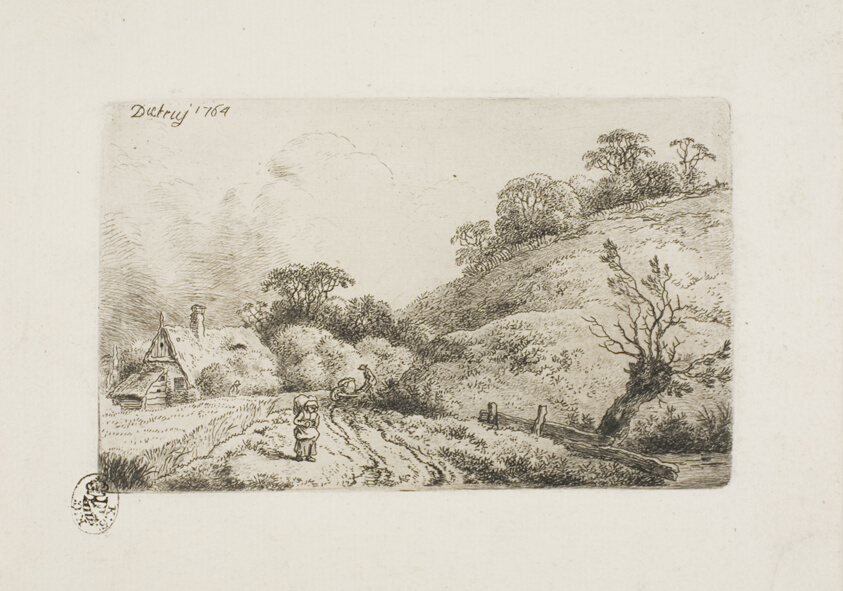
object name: Print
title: The Cornfield (Rembrandt Manner)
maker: Christian Wilhelm Ernst Dietrich (German, 1712-1774); after Rembrandt van Rijn (Dutch, 1606-1669)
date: 1764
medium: Mezzotint on paper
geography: Germany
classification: mezzotint; print; prints and drawing